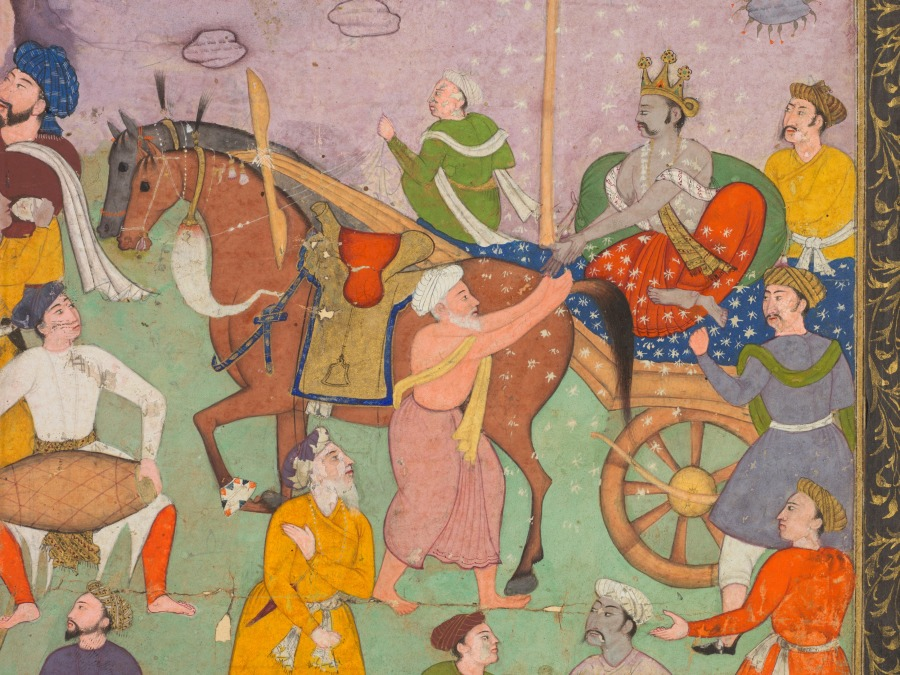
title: A charioteer riding through a rocky landscape with an entourage of footmen and musicians, page from a Razm-nama (Book of Wars) adapted from the Sanskrit Mahabharata and translated into Persian by Mir Ghiyath al-Din Ali Qazvini, known as Naqib Khan (Persian, d. 1614)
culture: India, Mughal, 17th century; made for Abd al-Rahim the Khan Khanan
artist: attributed to Yusuf Ali (Indian, active early 1600s)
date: 1616–17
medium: Gum tempera, ink, and gold on paper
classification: Painting